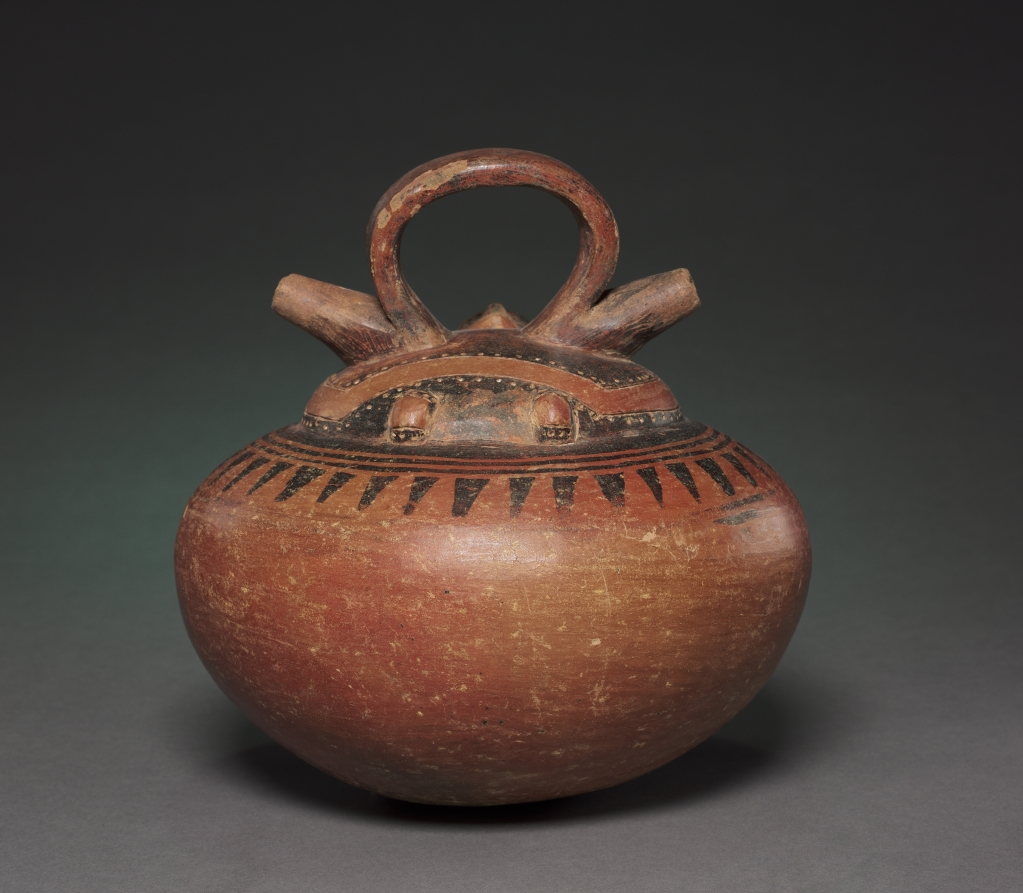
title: Double-Spouted Vessel with Reclining Figure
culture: Colombia, Calima region, Yotoco style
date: c. 1–800 CE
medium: ceramic, slip, resist paint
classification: Ceramic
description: This headdress ornament reveals a considerable flair for showmanship through its size and many suspended parts, which would have swayed and glittered with the wearer's motion. Like many other Yotoco ornaments, it features an enigmatic human face with closed eyes, a huge nose ornament that hides the lower face, and great disks that dangle from the ears.